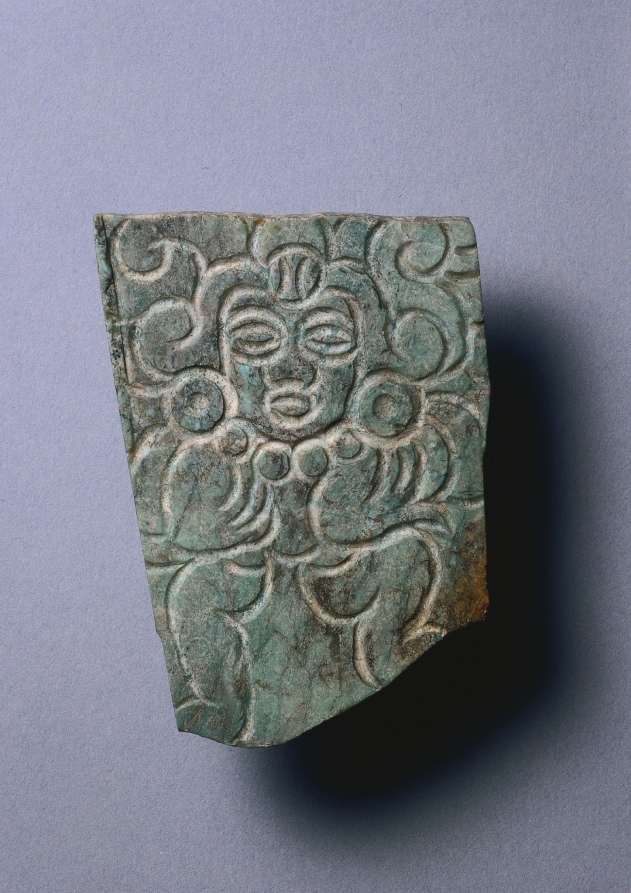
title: Pendant Plaque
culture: Central Mexico, Xochicalco Style, 8th-10th Century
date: c. 700–1000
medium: greenstone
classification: Stone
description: Xochipala jade carvings are typically composed almost entirely of curved lines. These were executed with hollow circular drills (perhaps made of bird bone or bamboo) of different diameters. The result is an animated figure that appears to be dancing.